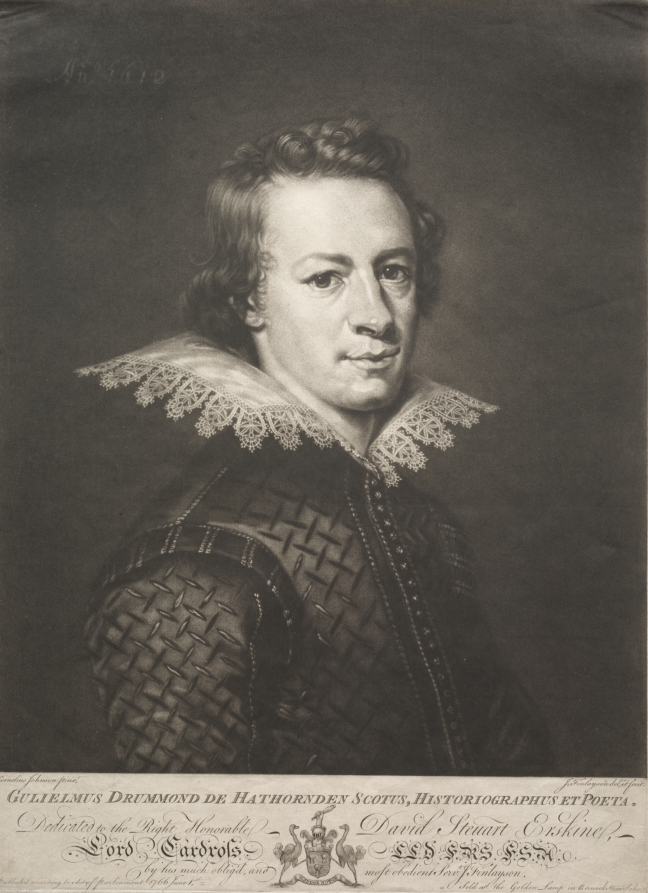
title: William Drummond of Hawthorndon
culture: England, 18th century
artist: John Finlayson (British, 1730–1776)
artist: after Abraham van Blyenberch (Flemish, 1587-1652)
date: 1766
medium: mezzotint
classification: Print